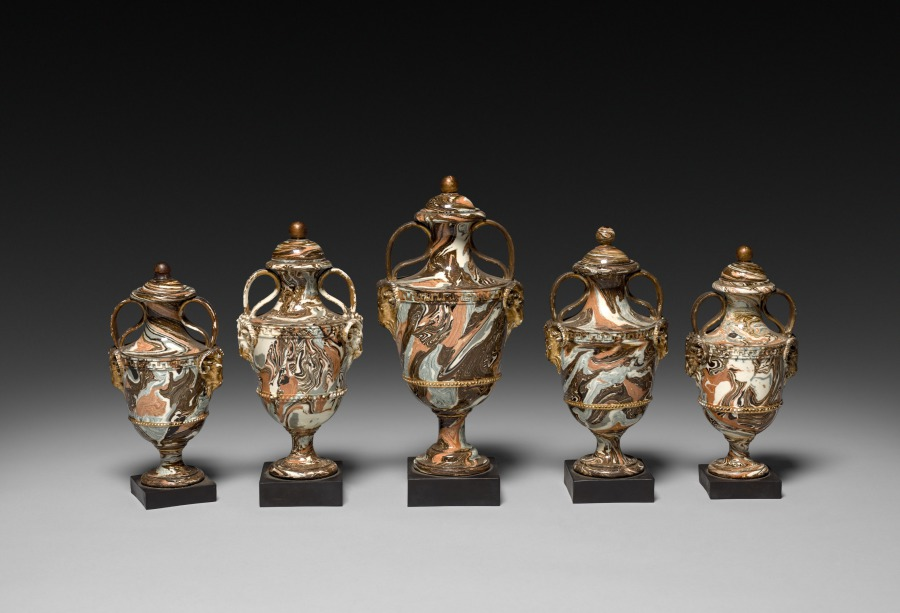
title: Urn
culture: England, late 18th or 19th century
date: late 1700s - 1800s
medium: earthenware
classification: Ceramic